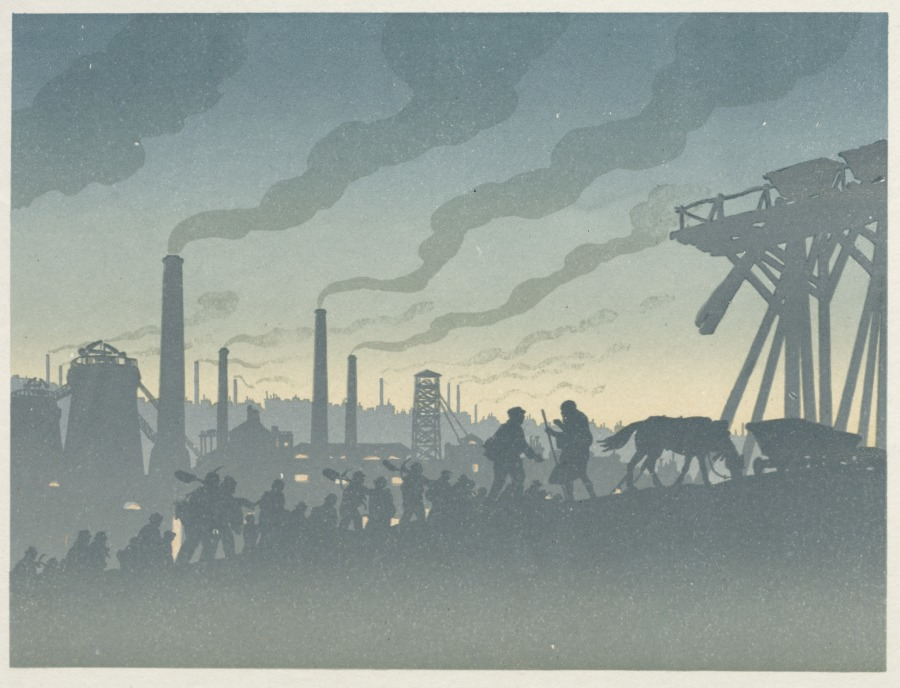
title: The Wandering Jew: The Modern City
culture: France, 19th century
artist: Henri Rivière (French, 1864–1951)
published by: Verneau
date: 1896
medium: color lithograph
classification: Portfolio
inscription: title page is signed, in blue crayon: Henri Rivière